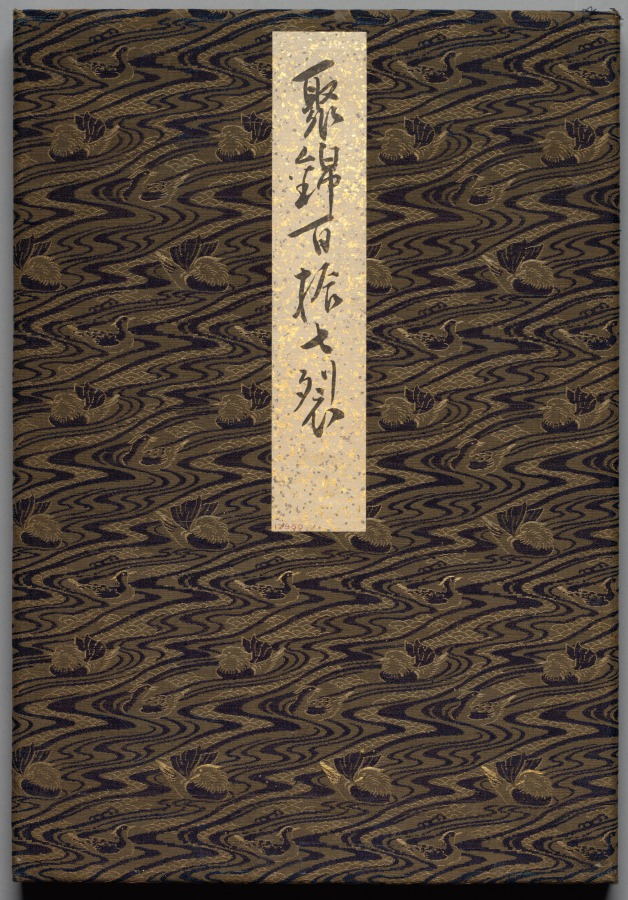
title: Album of Textile Samples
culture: Japan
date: 1790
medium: silk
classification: Textile